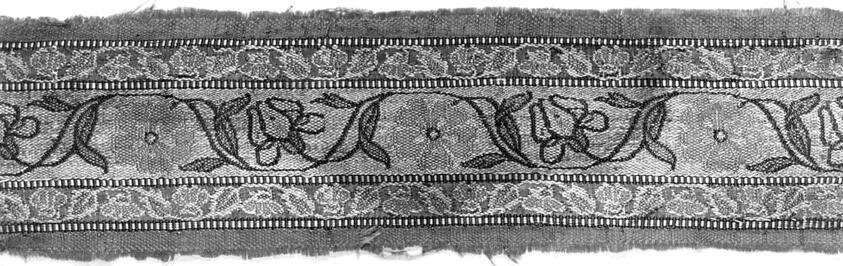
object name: Textile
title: Fragment (Border)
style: isfahan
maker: Iran (Persia, Isfahan)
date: 18th century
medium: Brocaded compound cloth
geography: Iran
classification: textile; weaving